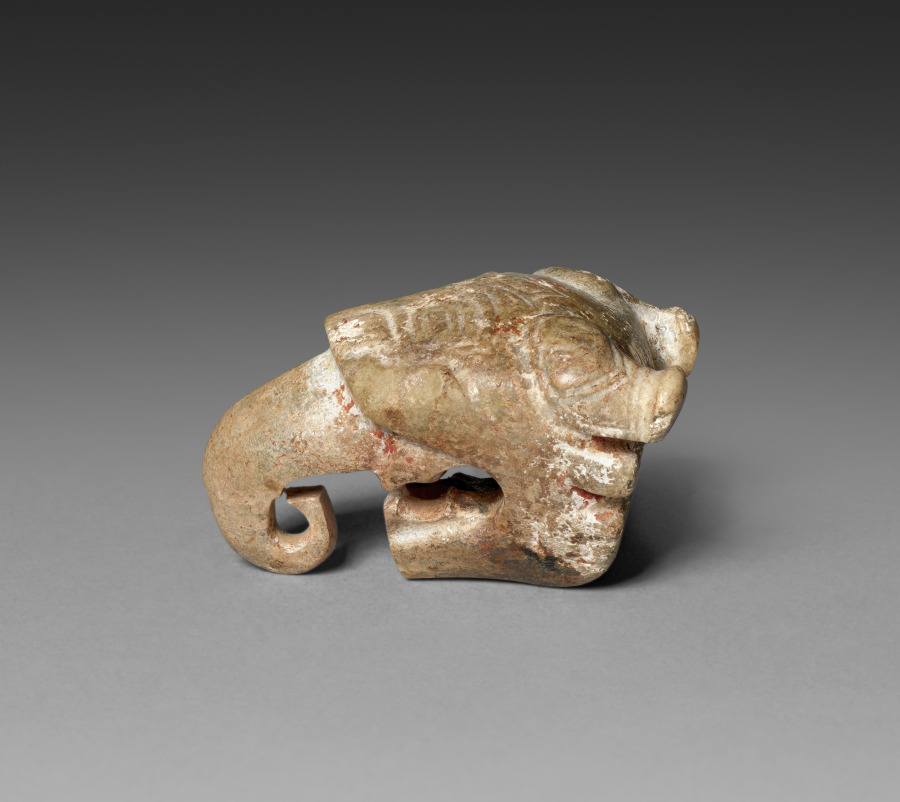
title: Feline Head with Bovine Horns and Elephant Trunk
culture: China, Shang dynasty (c. 1600–c. 1046 BCE)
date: 1300–1000 BCE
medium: jade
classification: Jade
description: This small jade was shaped into a fantastic, composite animal: a feline form with bovine horns and an elephant's trunk.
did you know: The mouth, the underside of the nose, and the tapering hole for attachment at the rear of the head were cut by drilling.